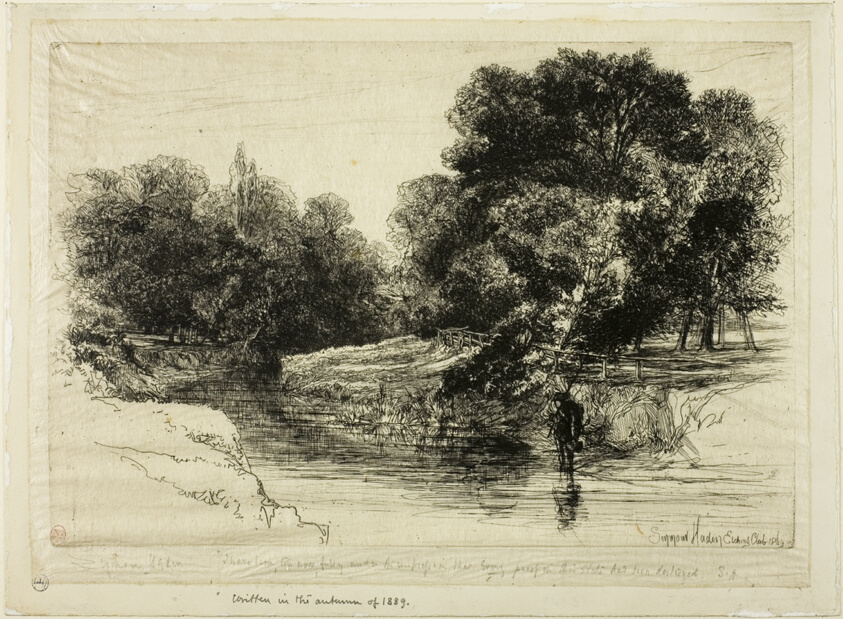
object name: Print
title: A River in Ireland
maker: Francis Seymour Haden (English, 1818-1910)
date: 1864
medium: Etching and drypoint on cream Japanese paper laid down at margins on ivory wove paper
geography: England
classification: etching; print; prints and drawing